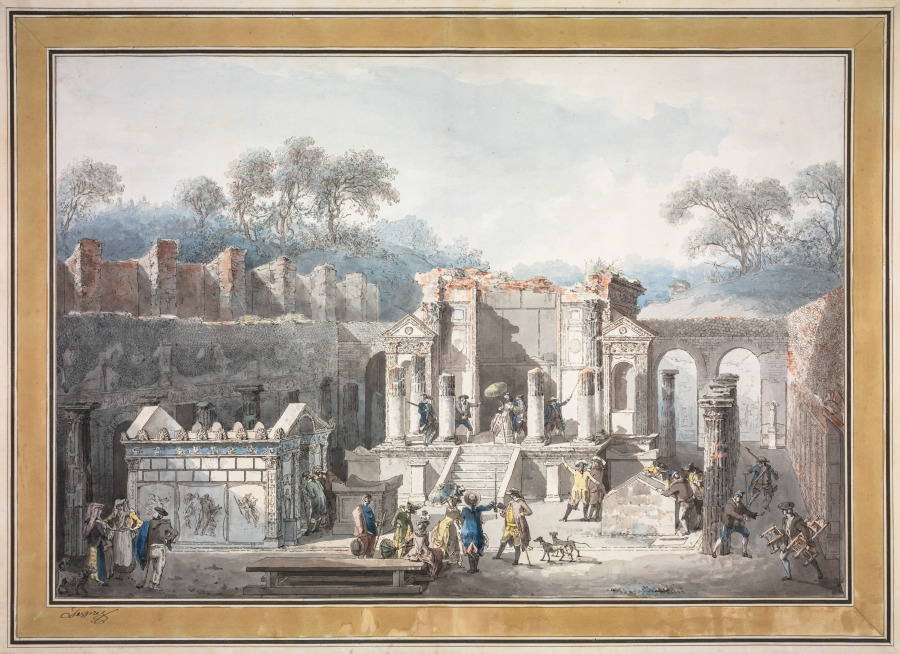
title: The Temple of Isis at Pompeii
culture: Italy, 18th century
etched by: Francesco Piranesi (Italian, 1758–1810)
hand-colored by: Louis Jean Desprez (French, 1743–1804)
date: 1788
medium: etching, hand-colored with watercolor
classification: Print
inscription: signed in black ink on decorative margin, lower margin:Desprez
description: Buried under layers of volcanic ash since the eruption of Mount Vesuvius in 79 CE, the ancient Roman sites of Herculaneum and Pompeii were rediscovered and excavated in the 1700s. Remarkably well preserved, the two cities captured the imagination of Enlightenment Europe. Artists Francesco Piranesi and Louis Jean Desprez capitalized on the popularity of the ancient sites, creating an innovative souvenir of Pompeii. Etched by Piranesi, the prints were based on Desprez’s real-life observations. The latter artist hand colored and signed select impressions that the two advertised as dessins coloriés, or colored drawings, meant only for hommes de goût, or "men of taste."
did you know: Francesco Piranesi visited Pompeii with his father in the 1770s.